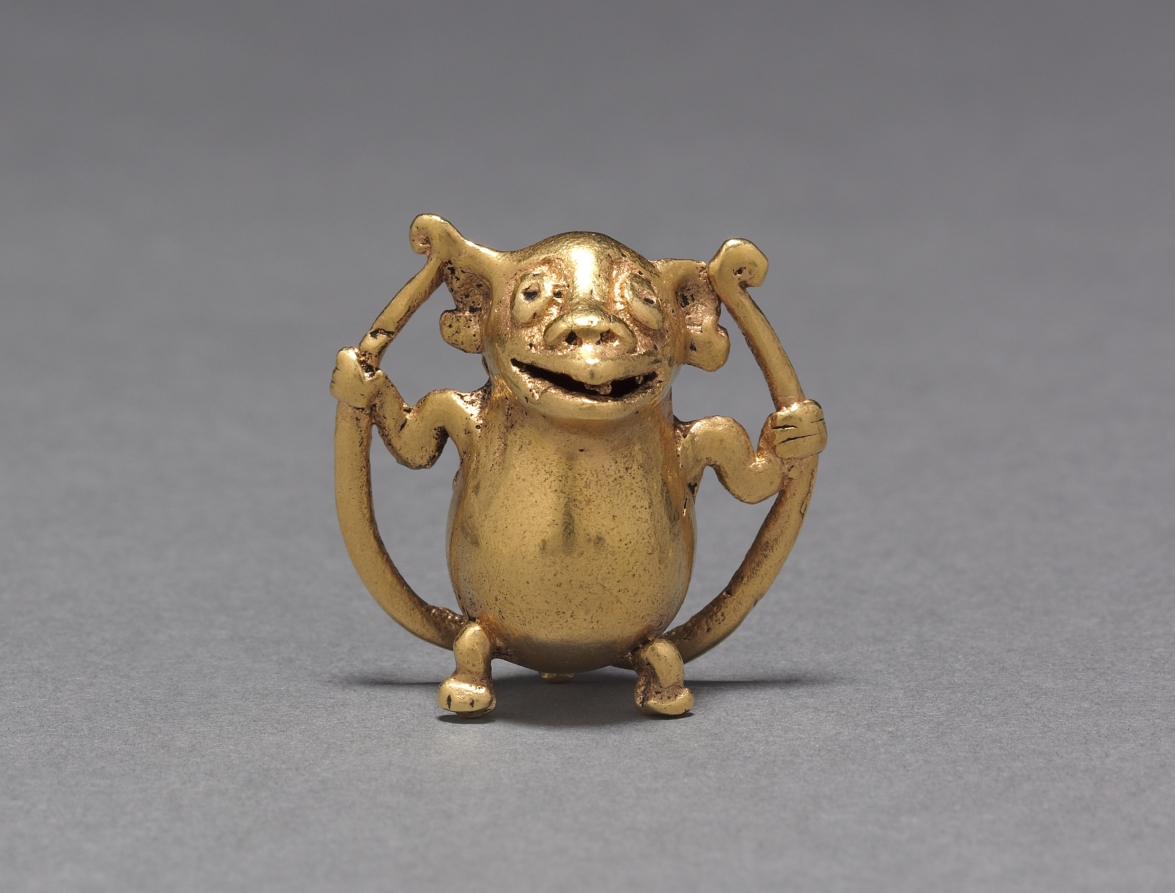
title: Monkey Bell Pendant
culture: Western Panama, Veraguas-Gran Chiriquí Style, c. 700-1550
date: c. 700–1550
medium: cast gold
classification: Metalwork